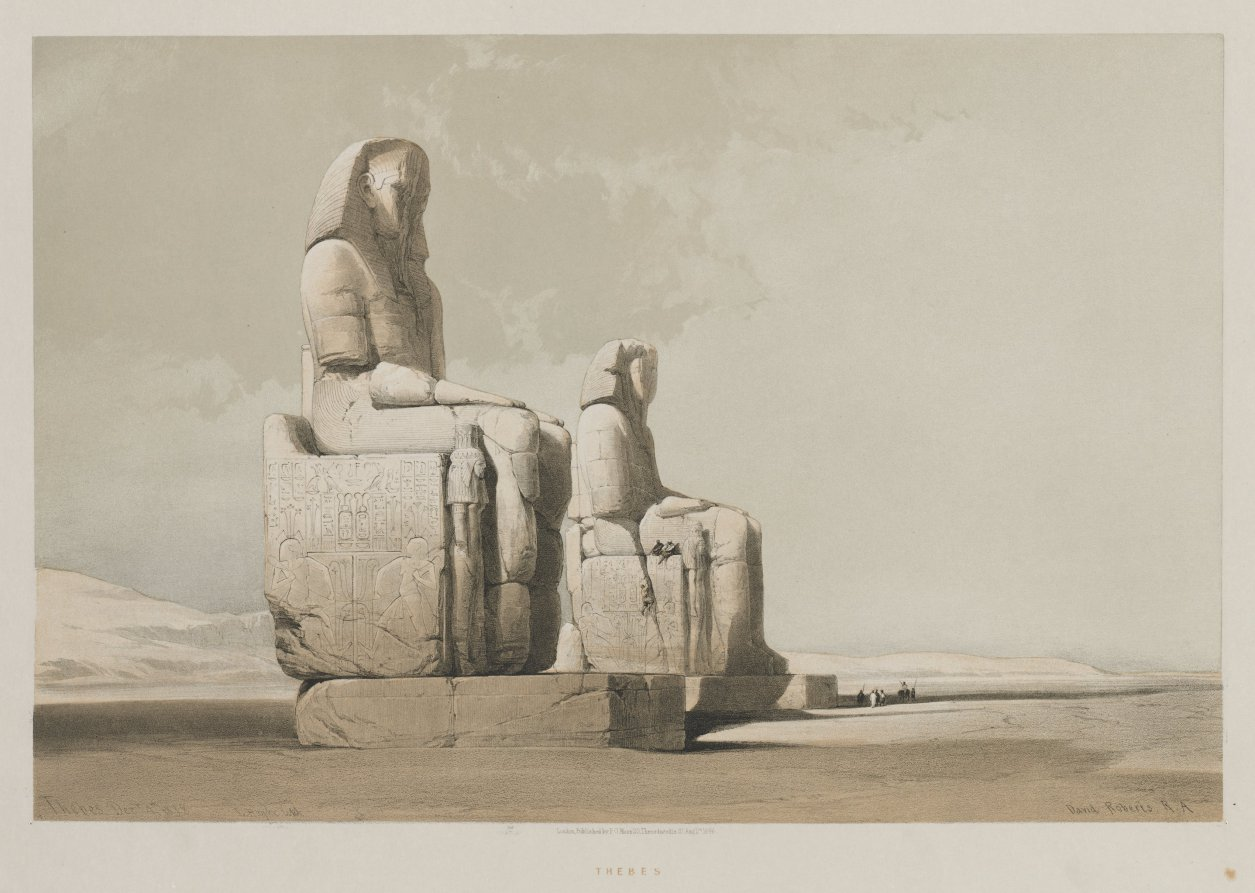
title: Egypt and Nubia, Volume I: Thebes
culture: England, 19th century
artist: Louis Haghe (British, 1806–1885)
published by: F. G. Moon, 20 Threadneedle Street, London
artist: after David Roberts (Scottish, 1796–1864)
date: 1846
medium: color lithograph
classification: Print